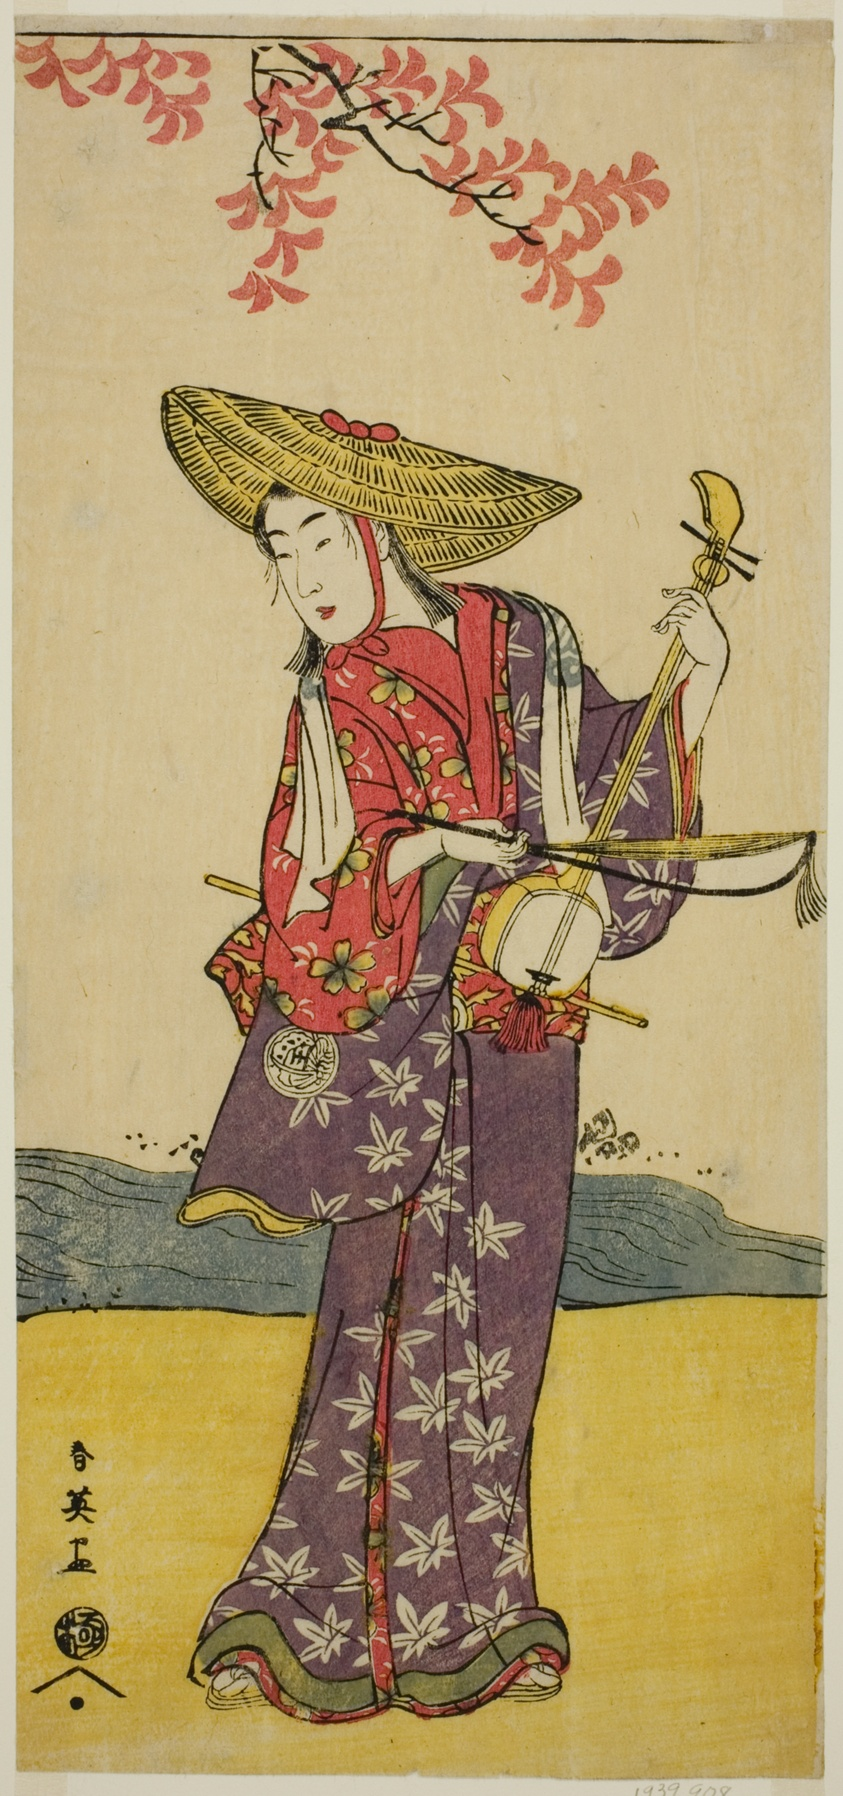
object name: Print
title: The Actor Sawamura Tamagashira as a Strolling Musician in the Play Dai Danna Kanjincho, Performed at the Kawarazaki Theater in the Eleventh Month, 1790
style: Japanese (culture or style)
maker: Katsukawa Shun'ei (Japanese, 1762-1819)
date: c. 1790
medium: Color woodblock print; hosoban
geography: Japan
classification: woodblock print; print; asian art